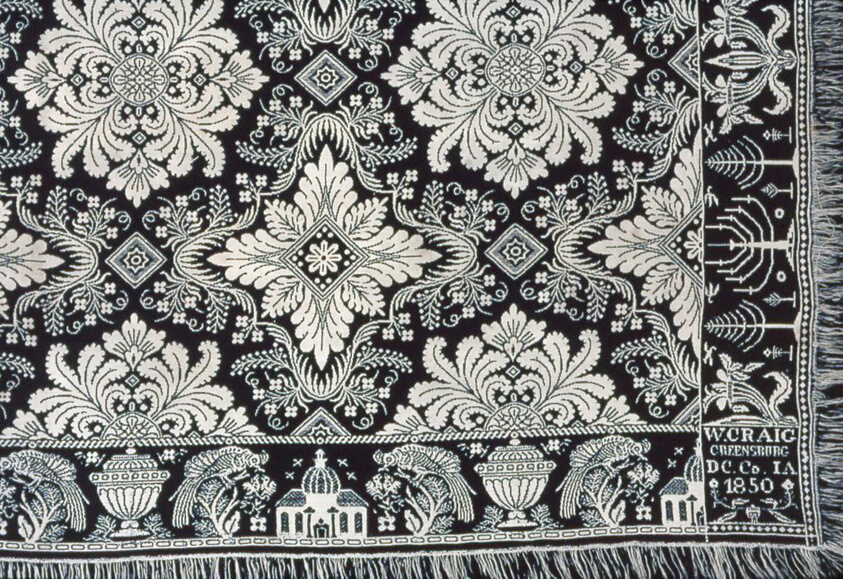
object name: Textile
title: Coverlet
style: 19th century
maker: William Craig, Jr. (American, c. 1824-1880); United States, Indiana, Decatur County, Greensburg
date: 1850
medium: Cotton and wool, plain weave double cloth; woven on loom with Jacquard attachment; two loom widths joined; fringed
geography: Indiana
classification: weaving - coverlet; coverlet; weaving; textile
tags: floral motifs, trees, circles, squares, flowers, diamond shapes, scrolls (motifs), medallions, foliage, candles, urns, buildings, birds, coverlet